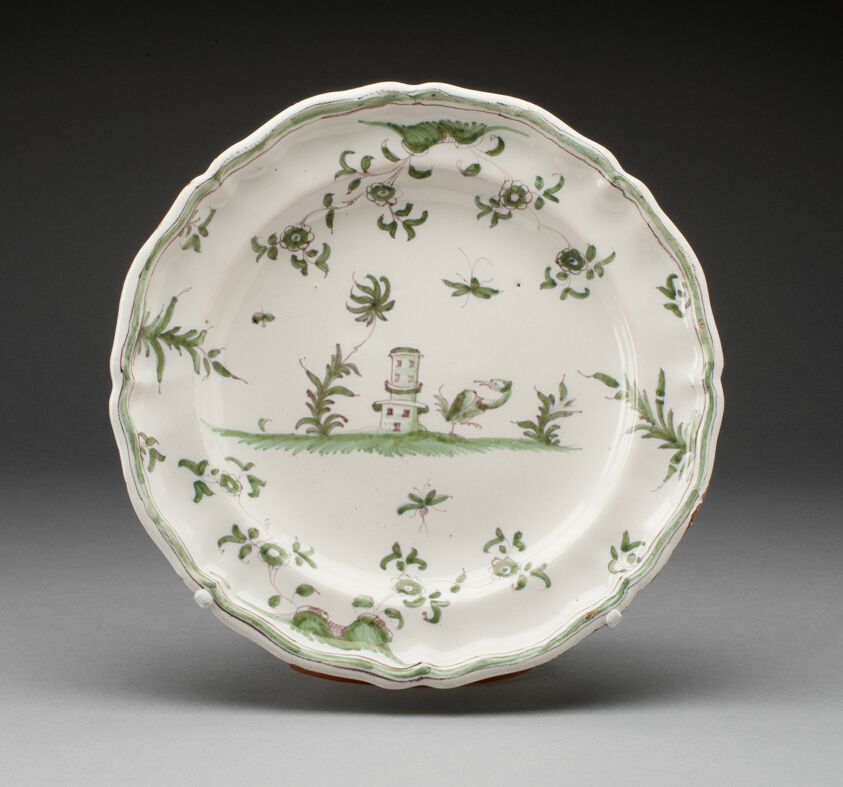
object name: Ceramics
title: Plate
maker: France, Varages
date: c. 1740/60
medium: Tin-glazed earthenware (faience)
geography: Varages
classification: plate (general, dish); dish (vessel); tin-glazed ware; earthenware; european decorative arts; ceramics